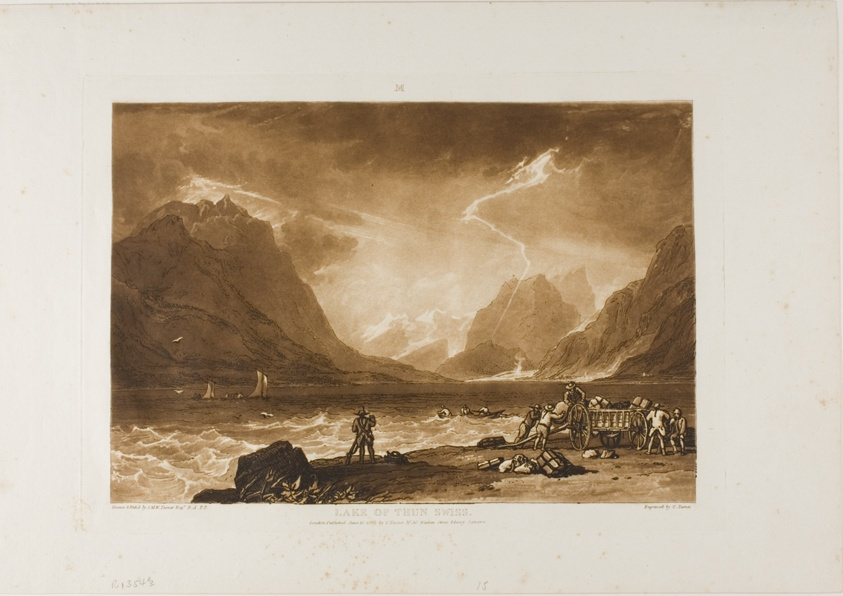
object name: Print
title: Lake of Thun, plate 15 from Liber Studiorum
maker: Joseph Mallord William Turner (English, 1775-1851); Engraved by Charles Turner (English, 1773-1857)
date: published June 10, 1808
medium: Etching and engraving in brown on ivory laid paper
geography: England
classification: etching; print; prints and drawing